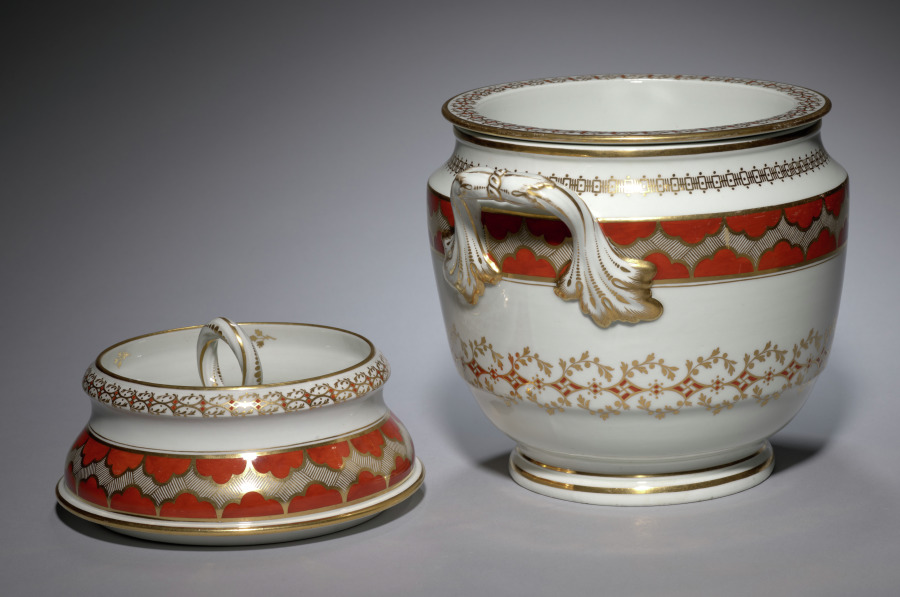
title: Ice Pail (1 of 2)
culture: England, late 18th-early 19th Century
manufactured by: Flight & Barr (British)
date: 1793–1807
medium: porcelain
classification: Ceramic